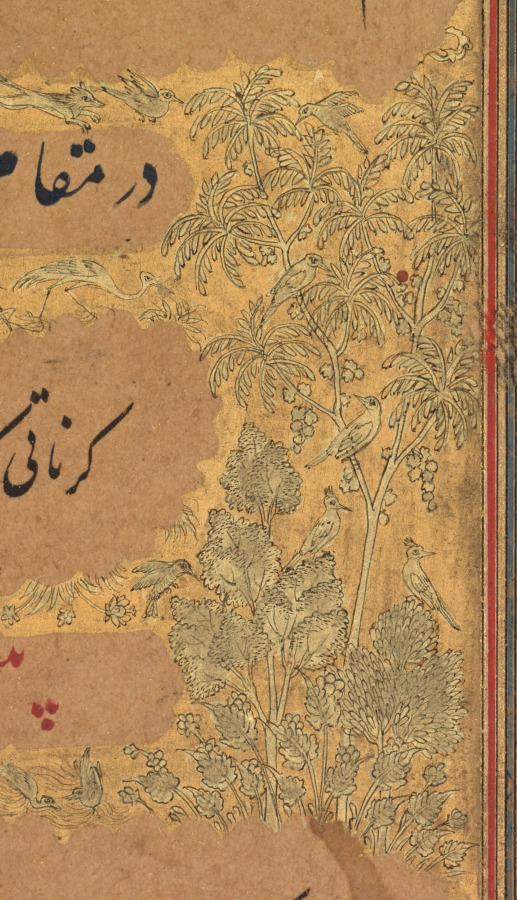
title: From Dohras (Songs) 40 and 36 from the Kitab-i Nauras of Sultan Ibrahim Adil Shah II (verso)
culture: India, Bijapur, Deccan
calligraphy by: Khalilullah Butshikan (Persian, active in India 1596–c. 1620)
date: 1618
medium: ink with two-tone gold on paper, double-sided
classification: Painting